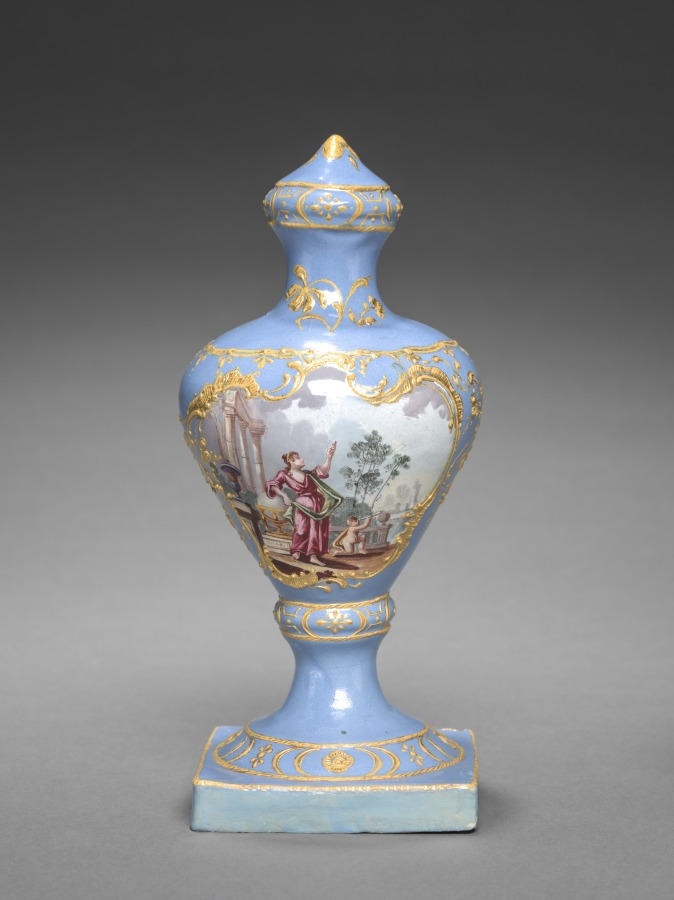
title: Urn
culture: England, South Staffordshire, 18th century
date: c. 1770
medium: enamel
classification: Enamel